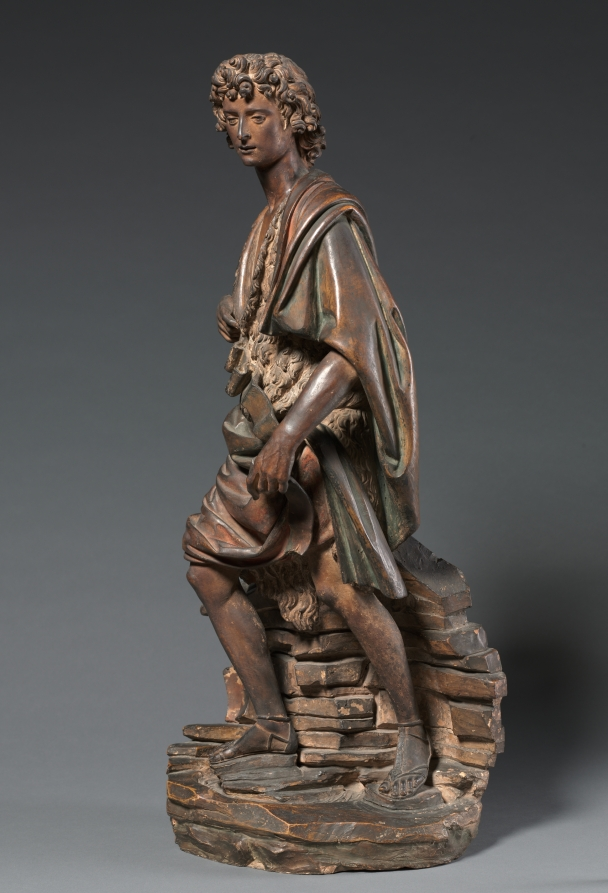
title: Saint John the Baptist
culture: Italy, Florence, 16th century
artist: Master of the Saint John Statuettes (Italian)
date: c. 1500–1525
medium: terracotta with traces of polychromy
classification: Sculpture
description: This statuette belongs to a group of terracotta sculptures representing David (from the OldTestament) and Saint John (from the New Testament) produced by a still unidentified Florentine artist and his studio in the late 1400s and early 1500s. Giventheir scale, it seems likely that these sculptures were intended for use in private homes rather than churches.